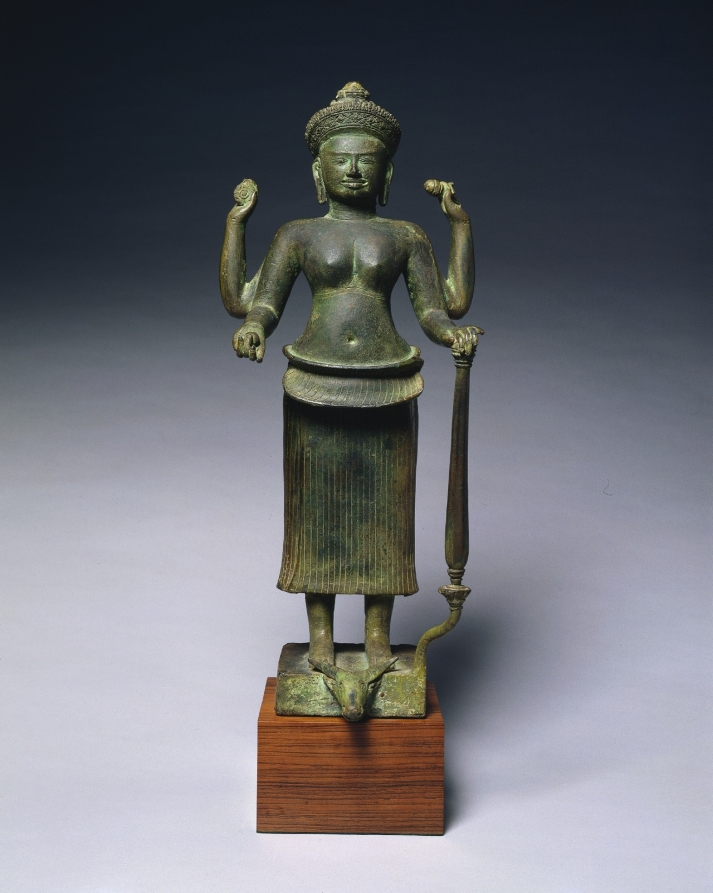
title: Durga as the Slayer of the Buffalo Demon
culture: Cambodia, probably Koh Ker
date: 900s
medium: bronze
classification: Sculpture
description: This depiction of Durga is rare and important, as it is a large-scale example of the goddess in bronze. Her conquest over the buffalo demon is indicated by its severed head at her feet. She stands four-armed and triumphant, with a wheel, conch shell, mace, and clod of earth in her hands.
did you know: The figure wears a head-dress, kirita-makuta, a diadem tied in the back and pointed at top.